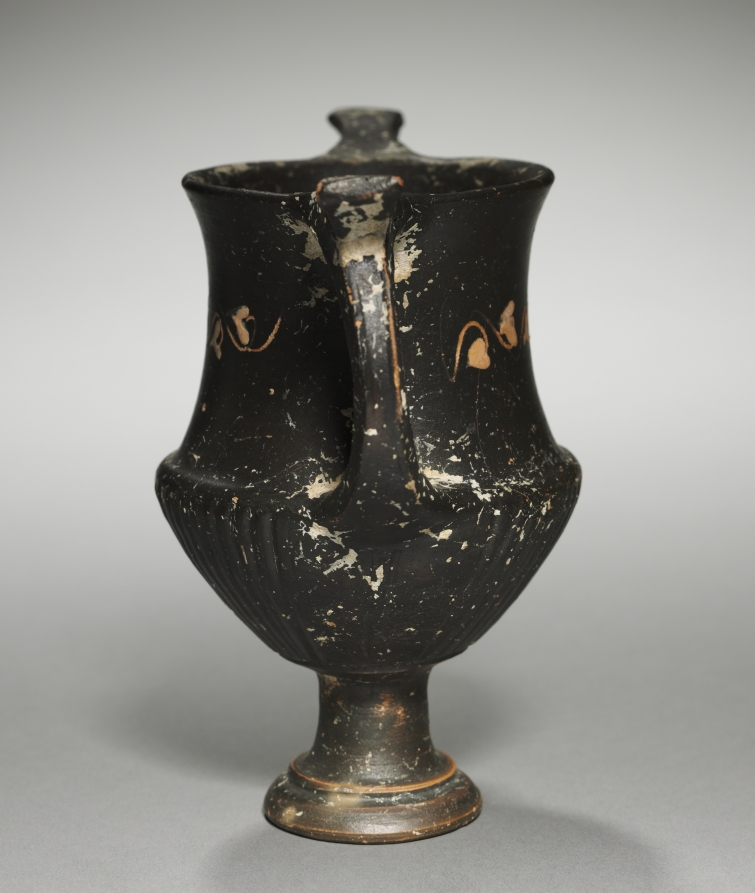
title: Black-Gloss Kantharos (Drinking Cup)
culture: Greek, Attic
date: c. 300–275 BCE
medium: ceramic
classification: Ceramic